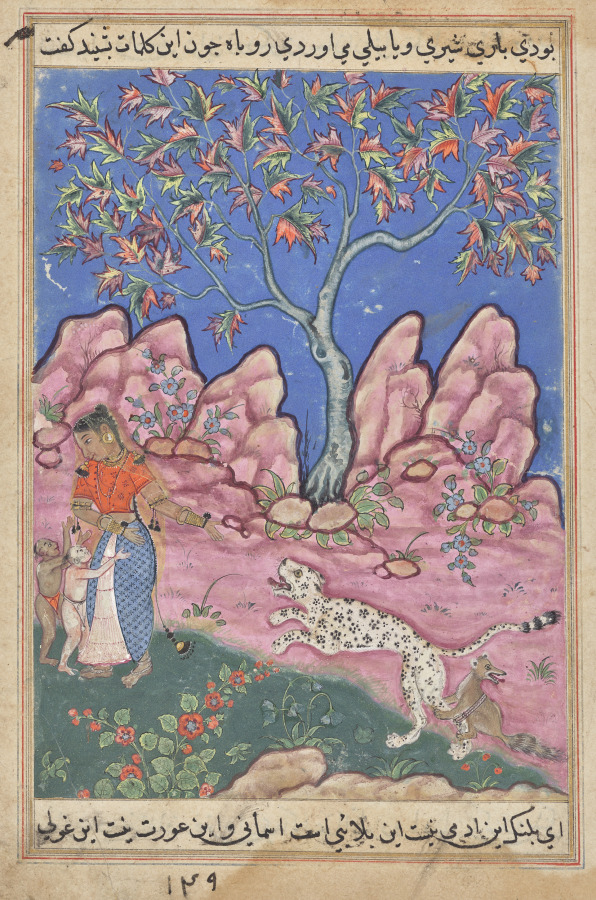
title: The woman conversing with her children, as the leopard returns, egged on by a fox who is tied to his leg, from a Tuti-nama (Tales of a Parrot): Thirtieth Night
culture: Mughal India, court of Akbar (reigned 1556–1605)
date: c. 1560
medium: gum tempera, ink, and gold on paper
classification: Painting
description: For the second time, the leopard appears in hopes of eating the woman and her children. Previously, he had fled after falling for the woman’s clever trick. He returns with the fox’s encouragement but is tricked again by the shrewd woman who convinces him that she is a hyena in human form.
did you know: The large tree in the background is a plane tree, which is a type of sycamore.